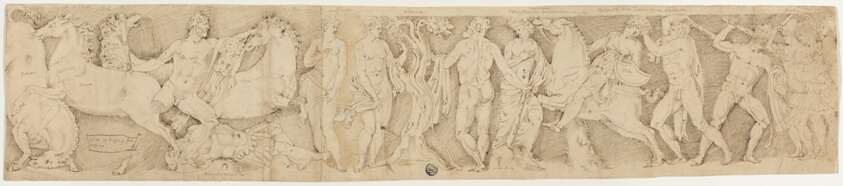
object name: Drawing and Watercolor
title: After the Antique: Sarcophagus Lid with the Labors of Hercules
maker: Probably Italian; early 16th century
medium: Pen and brown ink on tan laid paper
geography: Italy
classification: pen and ink drawings; drawings (visual works); prints and drawing